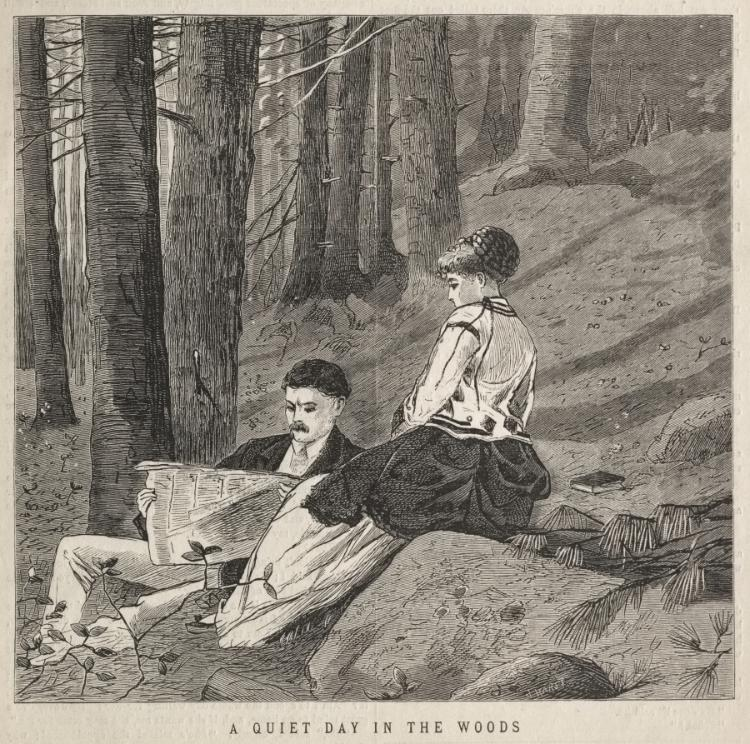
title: A Quiet Day in the Woods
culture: America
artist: Winslow Homer (American, 1836–1910)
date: 1870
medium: wood engraving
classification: Print